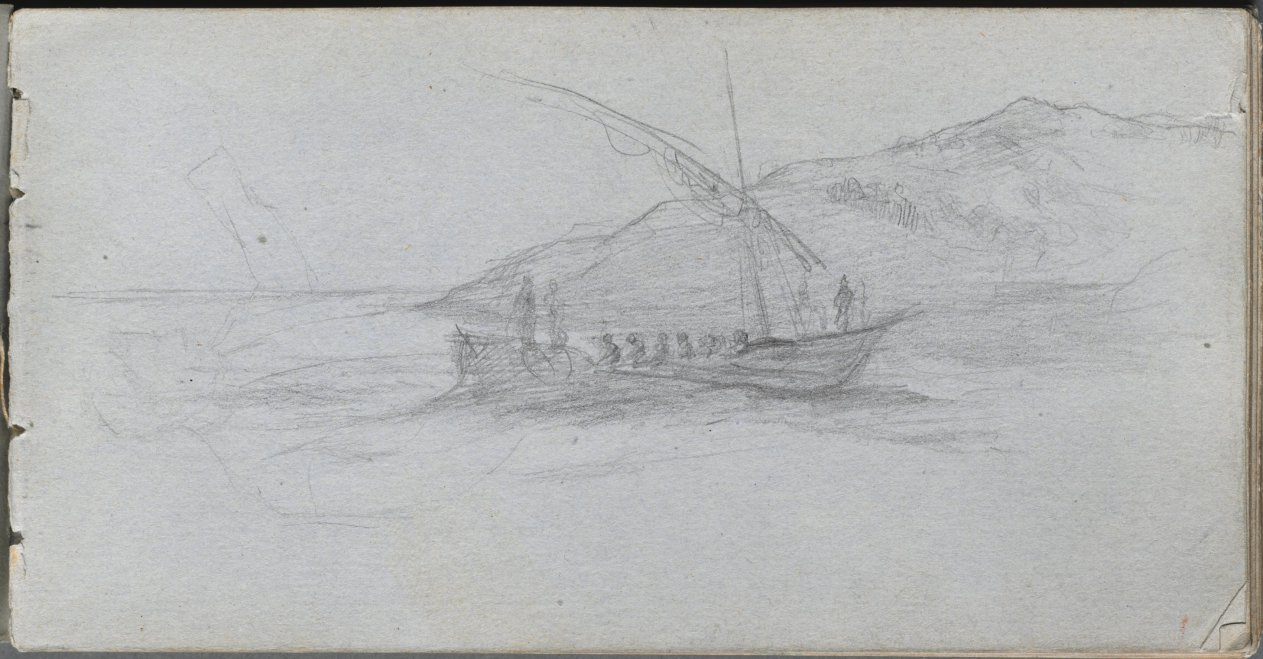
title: Sketchbook, page 88: Seascape and Figure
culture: France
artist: Ernest Meissonier (French, 1815–1891)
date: c. 1860s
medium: graphite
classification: Bound Volume